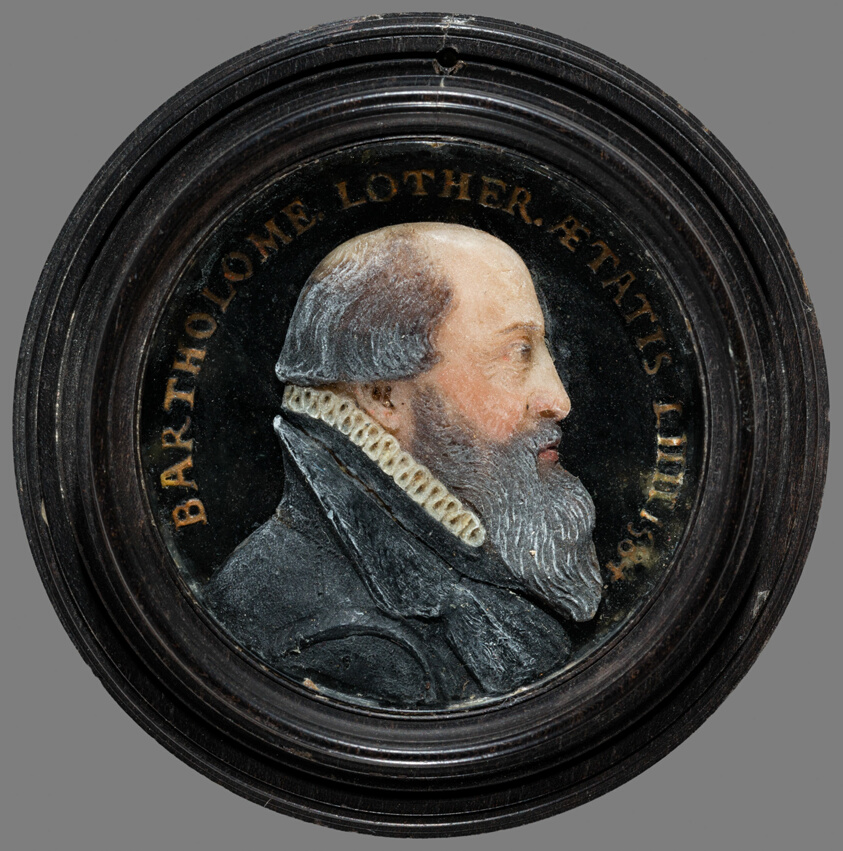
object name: Sculpture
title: Portrait of Bartholome Lother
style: sixteenth century, 16th Century, Renaissance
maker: German; Nuremberg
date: 1584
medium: Wax on glass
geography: Germany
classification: wax portrait; relief; sculpture; portrait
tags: portraits: male subject, busts, profile, man, portraits: German subject, portraits, portrait